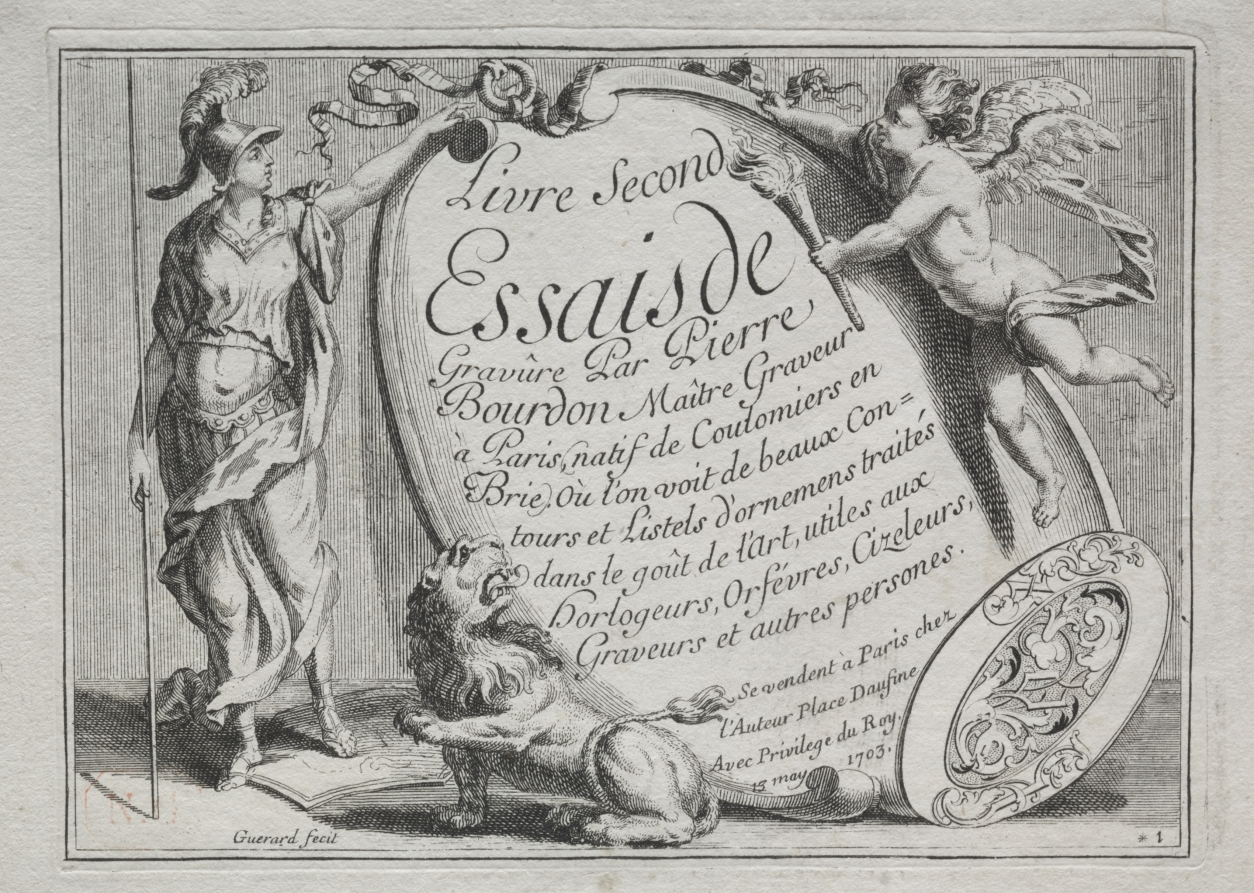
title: Goldsmith Design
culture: France, 18th century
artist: Pierre Bourdon (French)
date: c. 1703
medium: etching and engraving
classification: Print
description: The title page for this set of prints suggests that Bourdon’s designs are “useful for clockmakers, goldsmiths, chiselers, engravers and other people.” These craftsmen who made ornamented objects, such as the boxes and pistol below, sometimes consulted printed designs for inspiration. However, pattern prints similar to Bourdon’s also catered to aristocrats and wealthy professionals who pursued knowledge about styles and artists as a form of entertainment.